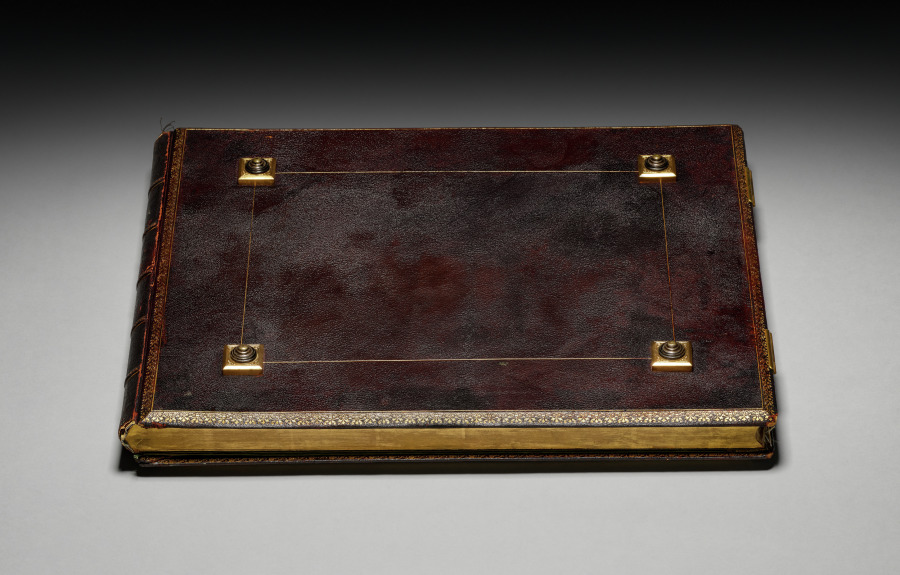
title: Box in the Form of a Book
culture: France(?)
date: c. 1865–80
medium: wooden box covered in leather with gilt metal enameled mounts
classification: Miscellaneous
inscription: central cartouche inset with bronze dore enamel initials, HBJR, N.2 in red, cobalt blue, lime green and white with gilt bronze outline and curliques, inset into medium brown cartouche with a gilt gridwork with each grid filled with a foliate flower, leaves and butterflies in varying sizes.